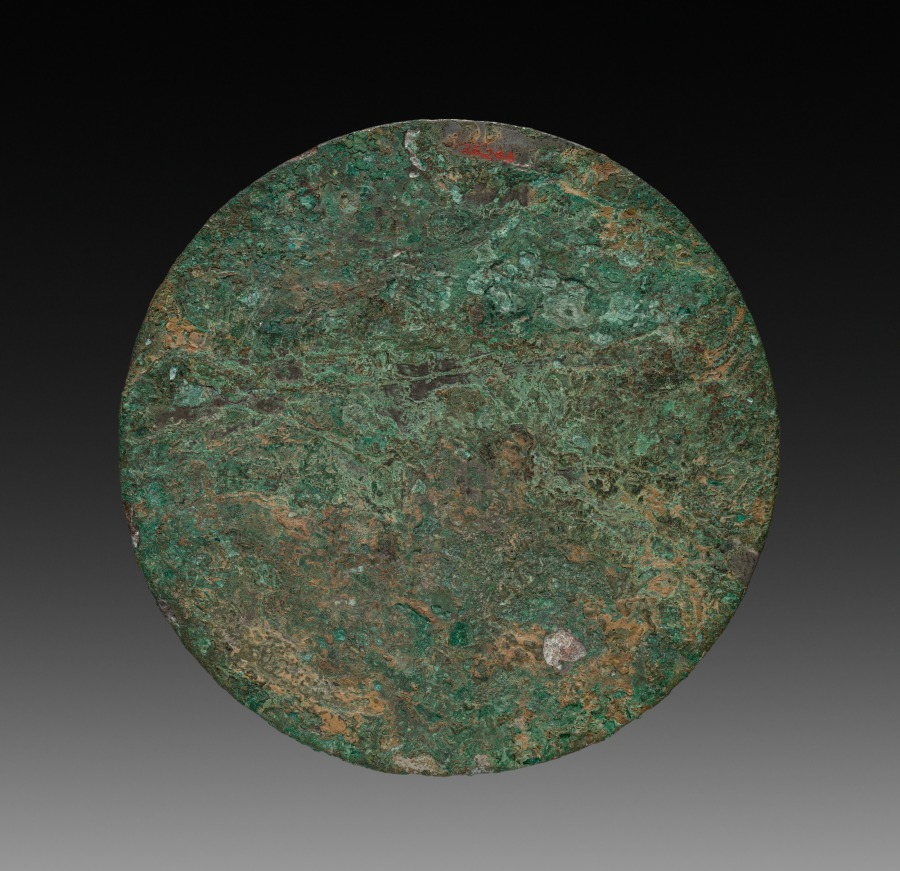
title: Mirror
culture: China, Tang dynasty (618–907)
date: 618–907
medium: bronze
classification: Metalwork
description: The predominant motifs on this mirror, the lion and the grapevine, were both foreign to China. The popularity of this mirror type, which lasted until the fall of the Tang dynasty, demonstrates the cosmopolitan tastes of wealthy Chinese during this extremely prosperous and artistically vigorous period.